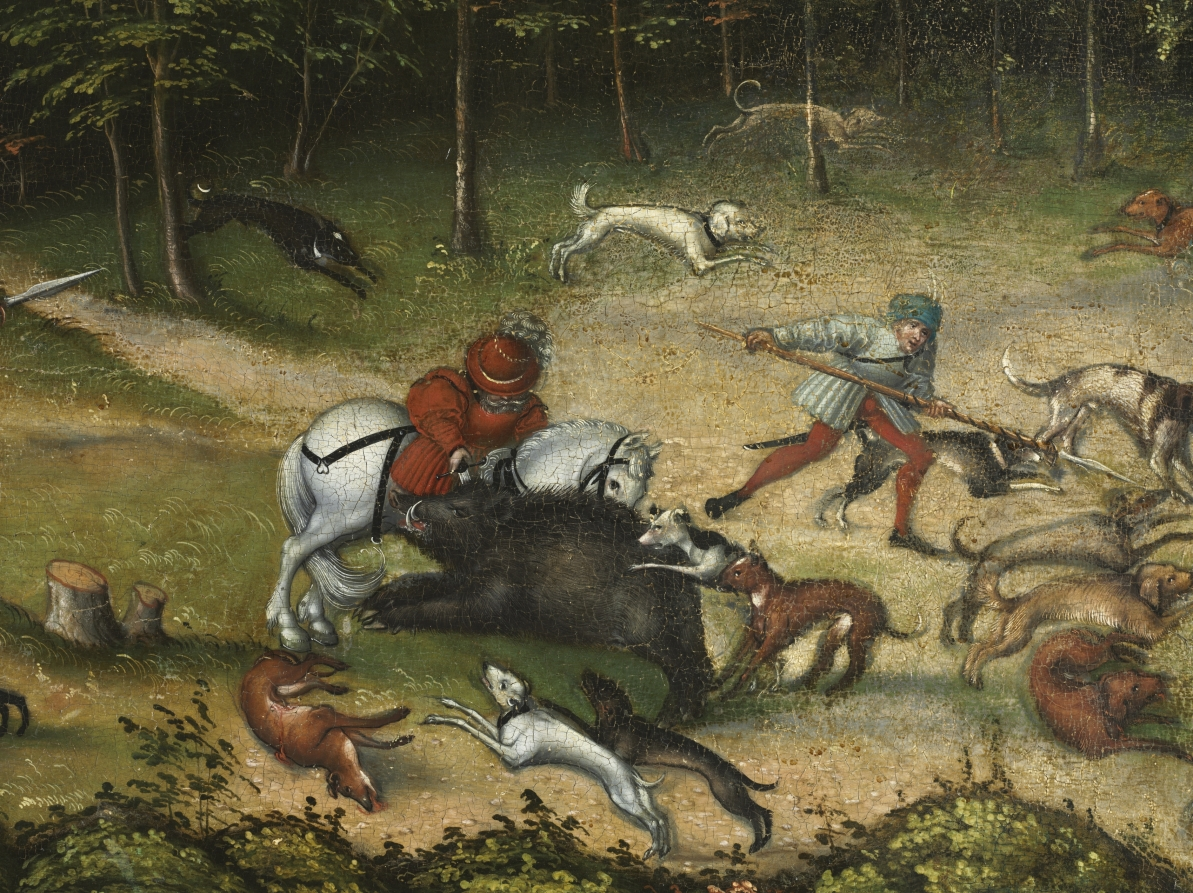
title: Hunting near Hartenfels Castle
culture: Germany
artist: Lucas Cranach (German, 1472–1553)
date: 1540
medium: oil, originally on wood, transferred to masonite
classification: Painting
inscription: Signed lower right on boat with a winged serpent, and dated: 1540 [inventory number, lower right: 1577]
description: The Protestant rulers of Saxony commissioned this animated hunt scene, set near their residence seen in the background, Hartenfels Castle (in eastern Germany). John Frederick the Magnanimous, in the bottom left corner, wears dark green hunting attire; he spans his crossbow and waits for his courtiers and dogs to chase a stag across the river. His wife, the Electress Sibylle, stands at right, poised to take the first ceremonial shot. The prince electors of Saxony were passionate practitioners of hunting with dogs—elaborate, highly rehearsed occasions, coordinated by the use of signals from hunting horns. Cranach dated this work and his signature is the winged snake at lower right. 1577 in the right corner is an inventory number.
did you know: Humans, dogs, and deer make up most of the creatures in this busy scene—but not all of them! Look closely at the background to spot a bear and three boars.